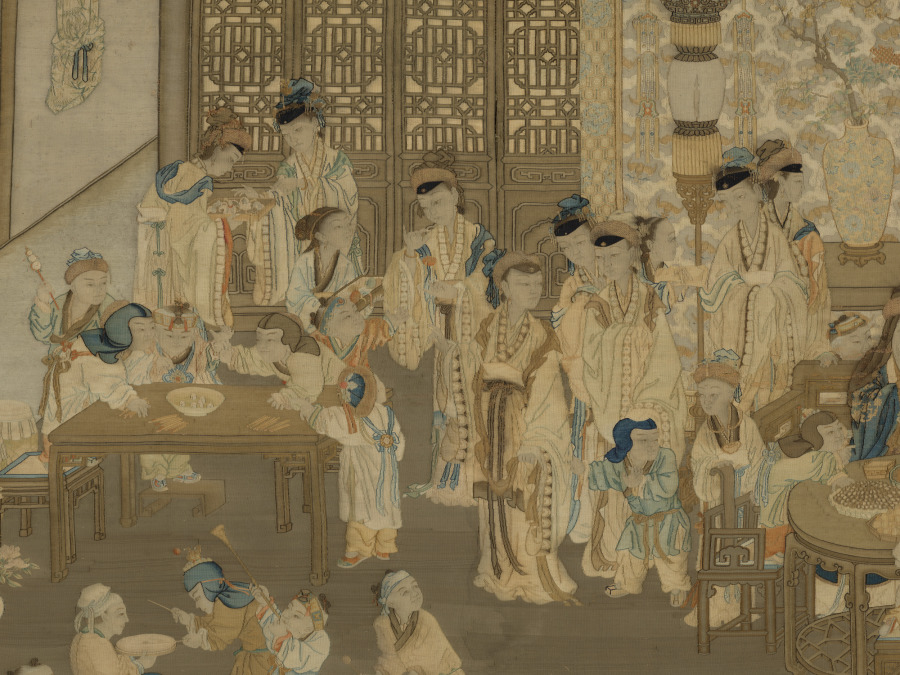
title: Family Gathering on New Year's Morning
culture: China, Qing dynasty (1644-1911)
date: late 1760s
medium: Silk and wool: tapestry weave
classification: Tapestry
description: This European-style tapestry depicts a family gathering, in a woven Western picture frame, that presumably once furnished the Hall of Cultivating the Mind (Yangxin dian) in the Forbidden City. The tapestry employs Western perspective and shading combined with the traditional Chinese subject of a family gathering in a palace, including motifs expressing wishes for good fortune and for a peaceful reign. In 1766, six French tapestries had been presented to the Chinese court. The Qianlong emperor was so intrigued that he commissioned tapestries in the French style from Suzhou. Records mention an imperial order for tapestries in the Western style, such as this one, in 1769, 1770, and 1775.